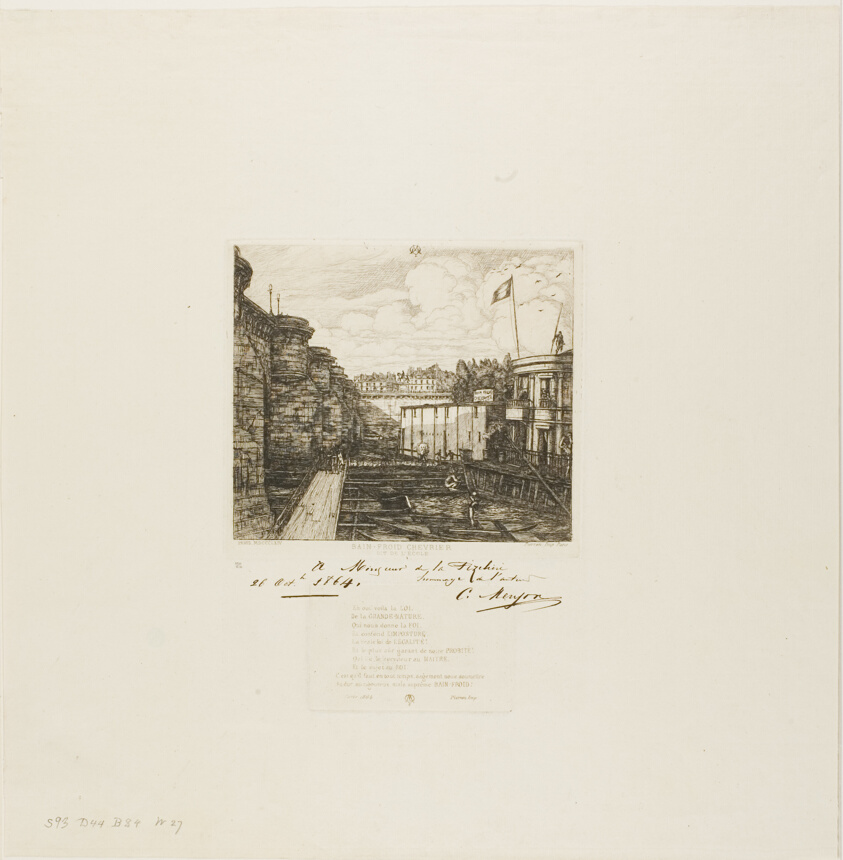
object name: Print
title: Chevrier's Cold Bath Establishment, Paris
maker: Charles Meryon (French, 1821-1868); printed by Pierron (French, 19th century)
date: 1864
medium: Etching in black and gold on ivory laid paper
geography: France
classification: etching; print; prints and drawing